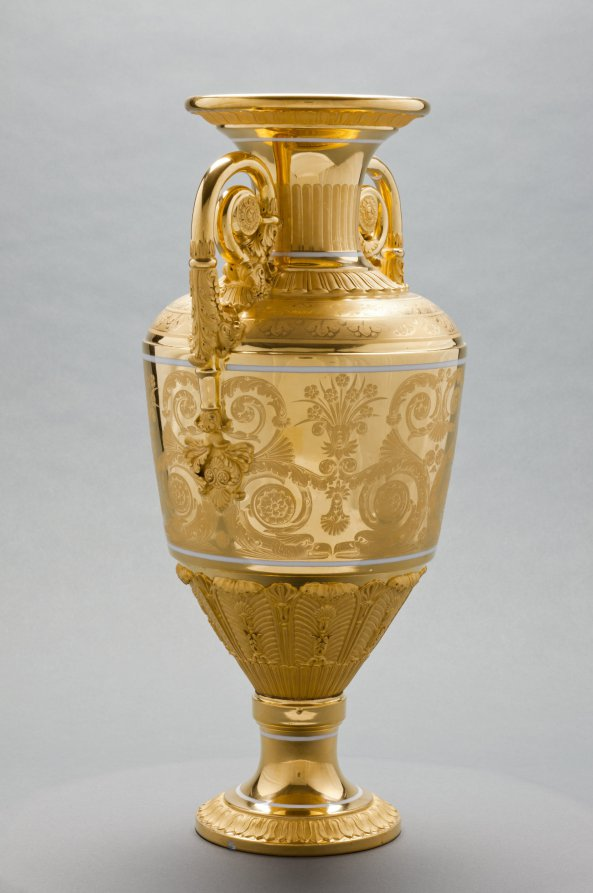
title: Vase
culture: Russia, St. Petersburg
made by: St. Petersburg Imperial Porcelain Factory (Russian)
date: c. 1820–1830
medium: gilt porcelain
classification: Ceramic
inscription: inscribed: "Moreau" in gold near lip.